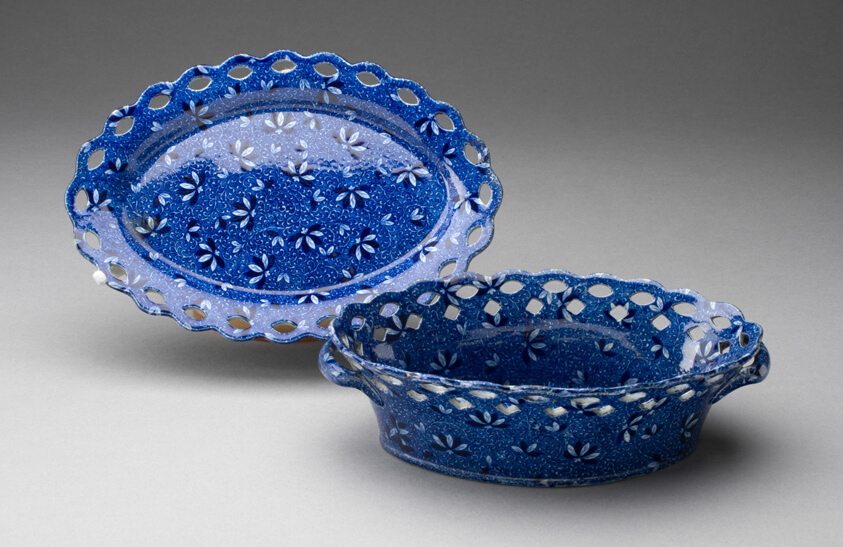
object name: Ceramics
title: Basket and Stand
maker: England, Staffordshire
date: Mid 19th century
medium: Earthenware with blue transfer-printed decoration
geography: Staffordshire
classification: tableware; earthenware; european decorative arts; ceramics